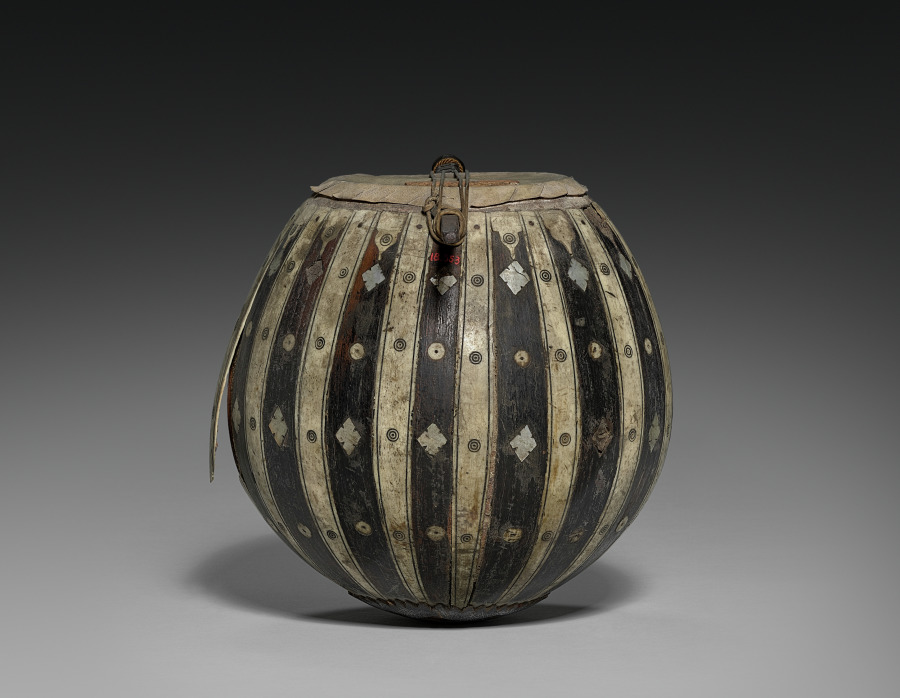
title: Kamānche (incomplete)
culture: Northern Iran (Caucasian, maybe Azerbaijan, or Kashmir)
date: 1875–1900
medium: Wood, hide, and bone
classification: Musical Instrument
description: Kamānche is a Persian term first used in the 10th century to describe an instrument that is sounded with a bow. From there, bowed instruments spread to Byzantium, Central Asia, the Far East, and then to Europe. In Egypt, it is known as the rabāb, a term known throughout the Islamic world from North Africa to Southeast Asia. The names of musical instruments often reveal origin, context, or musical function. In Europe, North Africa, and Asia where contact with Middle Eastern culture occurred, variations of Arabic and Persian terms for instruments are widespread. Usually, related names refer to similar instruments; however, this is not always true. Among these "floating terms" are the names zūrna, rabāb, kāmanja, nāy, and dombak.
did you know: The instrument's spike would be placed on the ground or today, on the knee, when it was played.